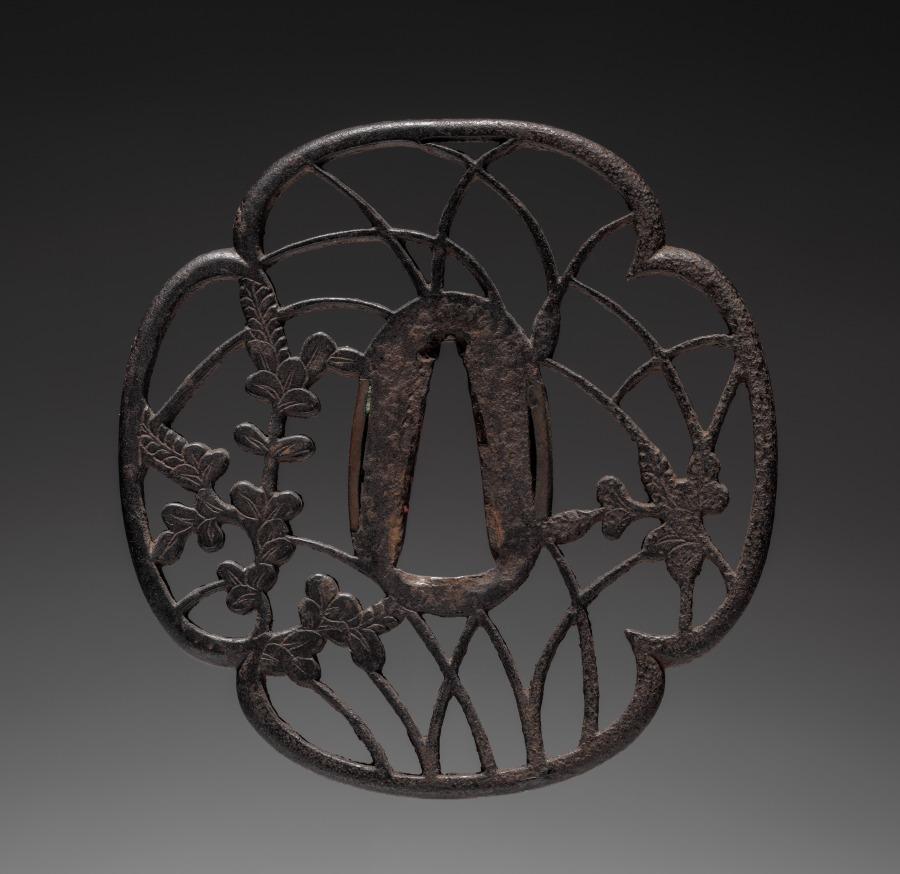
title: Sword Guard (Tsuba)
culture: Japan, possibly Edo period (1615-1868)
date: c. 1615–1868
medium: iron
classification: Arms and Armor